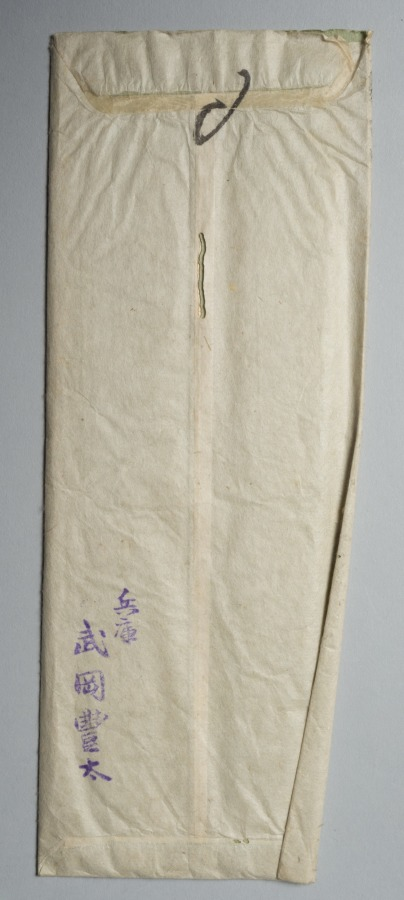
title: Courtesan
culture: Japan, Edo period (1615–1868)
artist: Matsuno Chikanobu (Japanese, active 1716–35)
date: 1716–35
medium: hanging scroll; ink and color on paper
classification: Painting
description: A glamorous courtesan sports an outer robe decorated with large roundels featuring plant motifs including iris and bush clover. Little is known about the life and artistic training of the painter Matsuno Chikanobu, an ukiyo-e artist who painted in a style strongly reminiscent of that of the Kaigetsudō studio. Many of his known paintings are on silk, and executed with high quality pigments, indicating that his primary clientele were wealthy individuals.